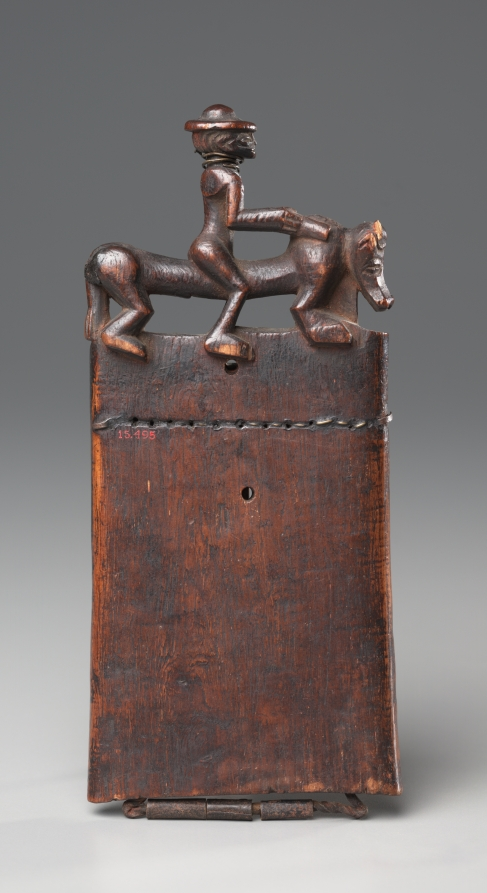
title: Lamellophone (chisanji)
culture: Africa, Central Africa, Democratic Republic of the Congo or Angola, Chokwe-style maker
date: late 1800s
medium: Wood, iron, and wire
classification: Musical Instrument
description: The thumb piano portrays a wonderfully animated man riding a curious quadruped. His hat suggests he is probably a trader (pombeiro) engaged in long-distance commerce.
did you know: The CMA acquired this plucky instrument in 1915, one year before it opened to the public.